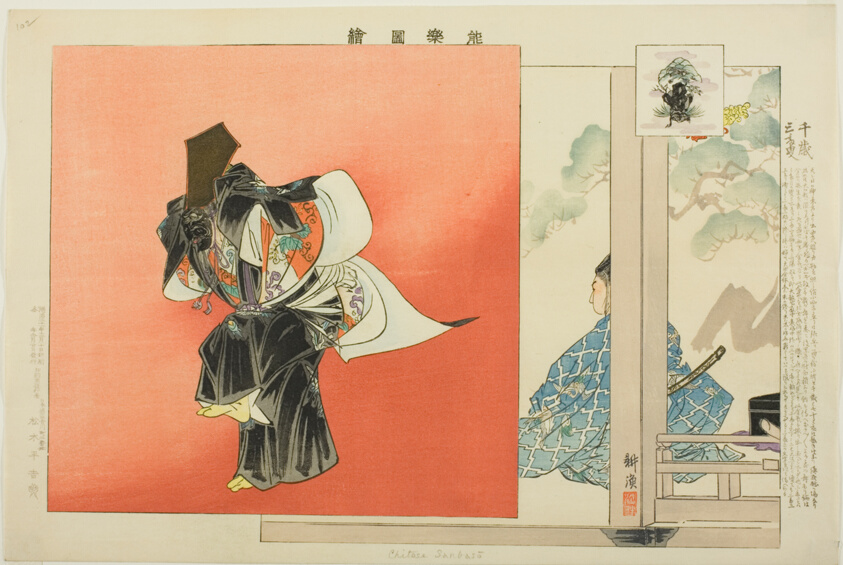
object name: Print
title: Chitose Sanbaso, from the series "Pictures of No Performances (Nogaku Zue)"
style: Japanese (culture or style)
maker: Tsukioka Kogyo; Japanese, 1869-1927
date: 1898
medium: Color woodblock print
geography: Japan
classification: woodblock print; print; asian art